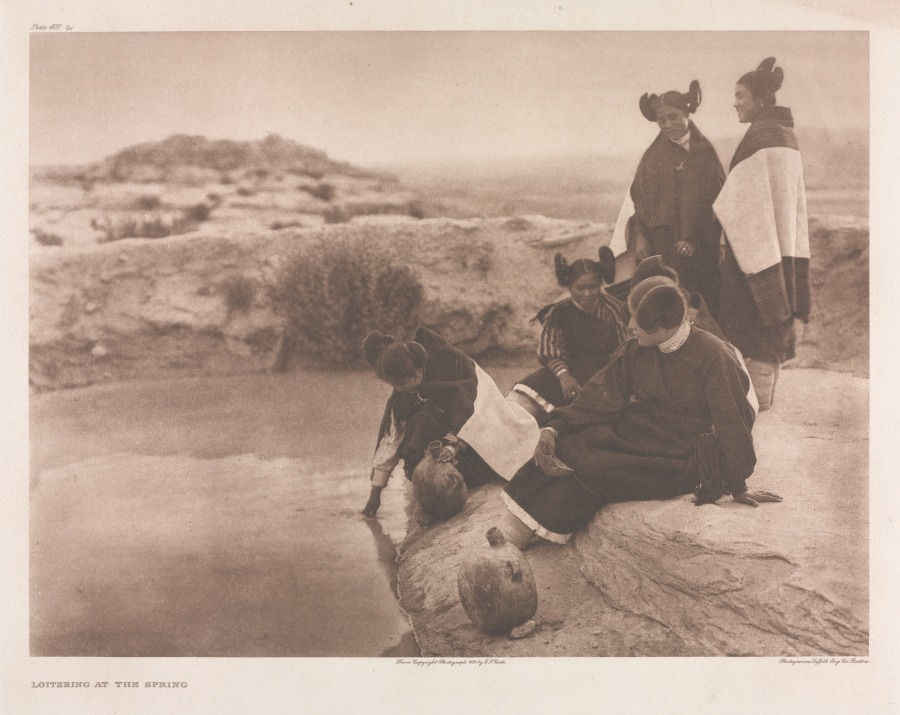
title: Portfolio XII, Plate 400(b)- 435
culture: America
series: The North American Indian: being a series of volumes picturing and describing the Indians of the United States, The Dominion of Canada, and Alaska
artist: Edward S. Curtis (American, 1868–1952)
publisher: The University Press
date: 1900–1921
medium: photogravure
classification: Portfolio